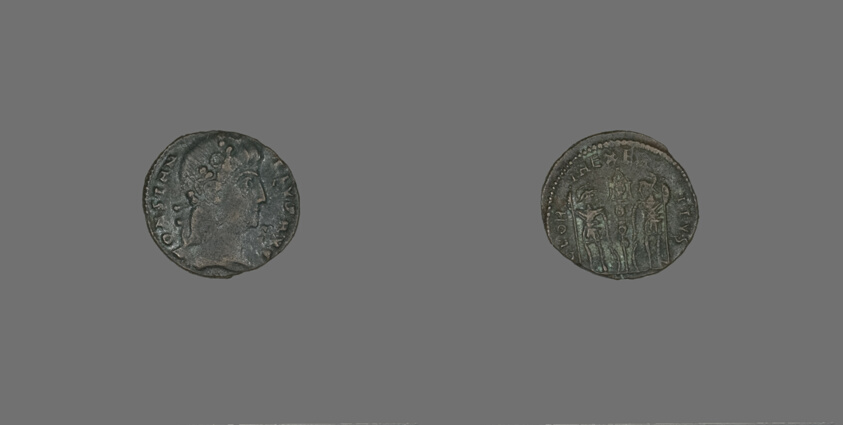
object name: Coin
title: Coin Portraying Emperor Constantius II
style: greco-roman, greco-roman (egyptian)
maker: Roman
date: 337-361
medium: Bronze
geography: Ancient Mediterranean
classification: coin; ancient art